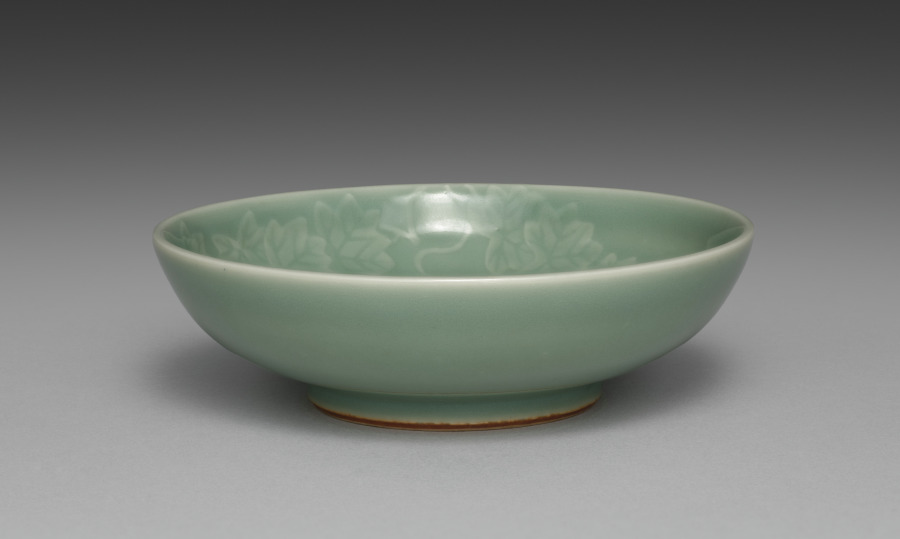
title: Dish from Dishes with Ivy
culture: Japan, Meiji period (1868–1912)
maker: Seifū Yohei III (Japanese, 1851–1914)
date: 1893–1914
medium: One from a set of five dishes; porcelain with green glaze and molded designs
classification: Ceramic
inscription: 清風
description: Yohei III’s main output for his sophisticated clientele was in the form of tea sets and dining sets. He often produced in pairs, sets of five, or sets of ten. This set of five dishes with a green glaze and designs of ivy vines in very low relief has unfortunately lost its box. These dishes are slightly larger than the other dishes, like CMA 2022.187, and so may have been not saucers but rather small plates for meals.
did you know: In his career, Seifū Yohei III created a range of dishes in green glazes.